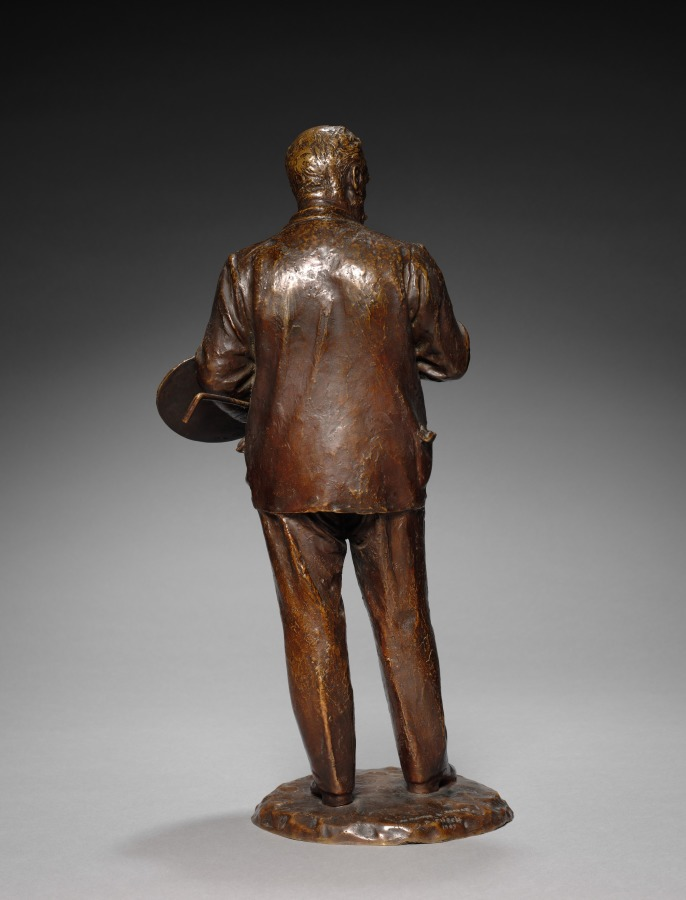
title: Standing Figure of Léon Bonnat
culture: France, 20th century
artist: Denys Pierre Puech (French, 1854–1942)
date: 1903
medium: bronze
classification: Sculpture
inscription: Signed and dated: "1903"; inscribed: "au maitre L. Bonnat"